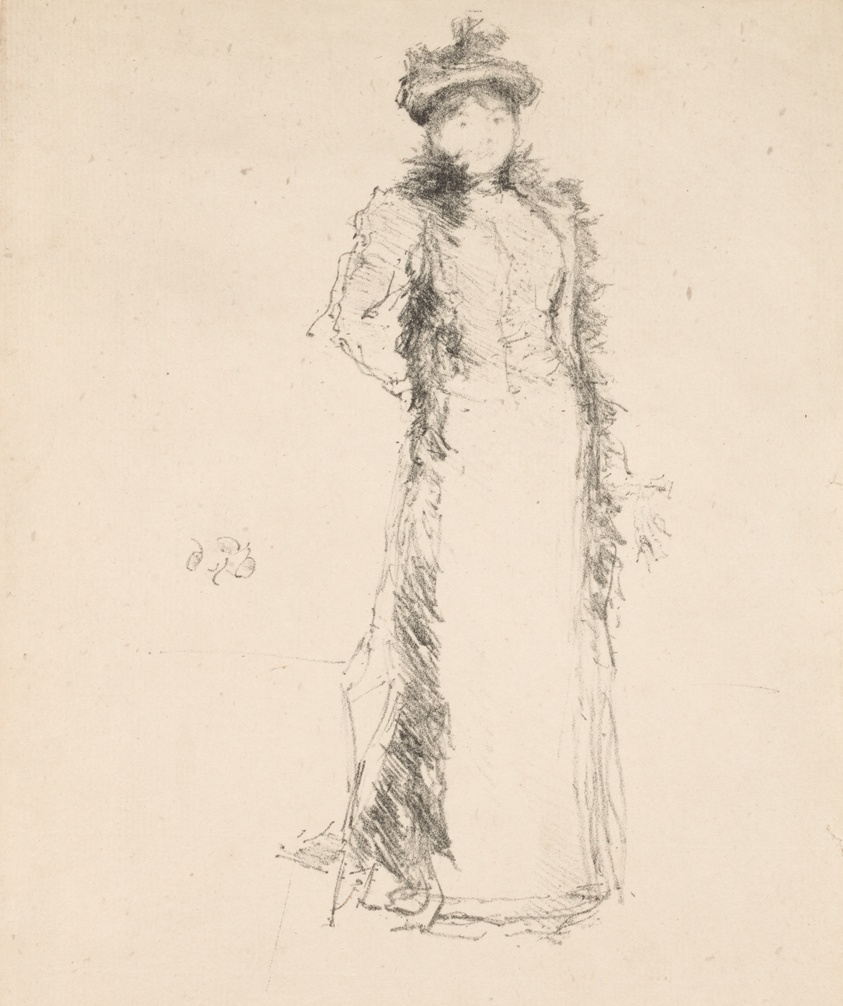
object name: Print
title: Beatrix Whistler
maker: James McNeill Whistler (American, 1834-1903)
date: 1893 (only printed posthumously 1903)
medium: Transfer lithograph in black ink on ivory laid paper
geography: United States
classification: transfer lithograph; lithograph; print; prints and drawing; paper